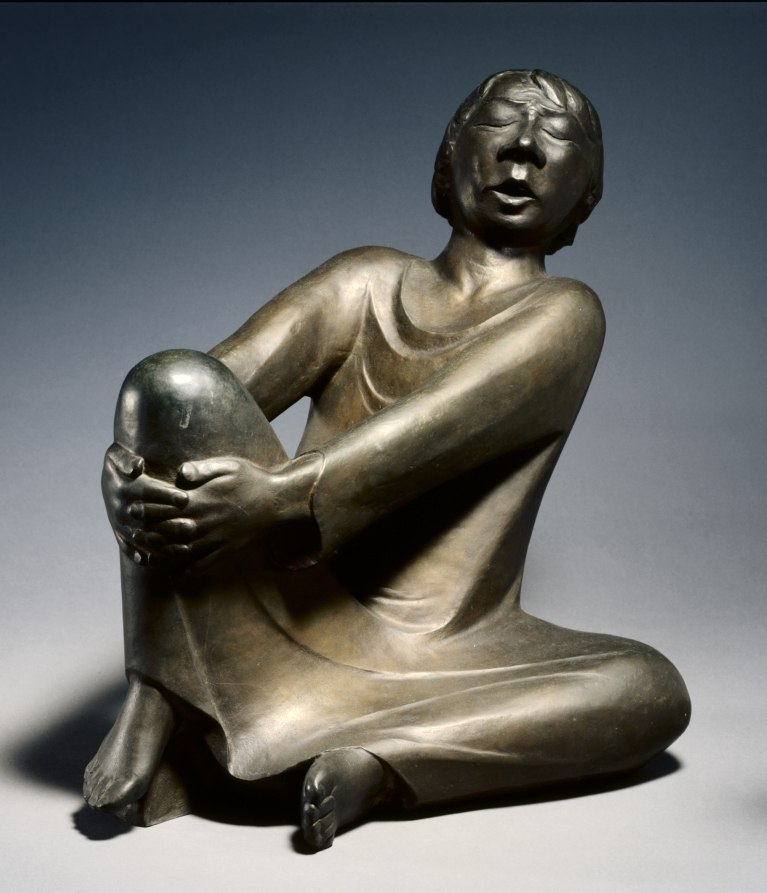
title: Singing Man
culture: Germany, 20th century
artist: Ernst Barlach (German, 1870–1938)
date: 1928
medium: bronze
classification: Sculpture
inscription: Signed on support under right foot: "E. Barlach"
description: One of the most celebrated sculptors of the Expressionist movement in Germany, Barlach first began exploring ways to convey inner feeling through depictions of the human body around 1906. As this singing man pulls his knee toward his body, his closed eyes and open mouth suggest deep concentration. A staunch opponent of the Nazis, Barlach was declared a “degenerate artist” and forbidden to teach or exhibit in Germany.